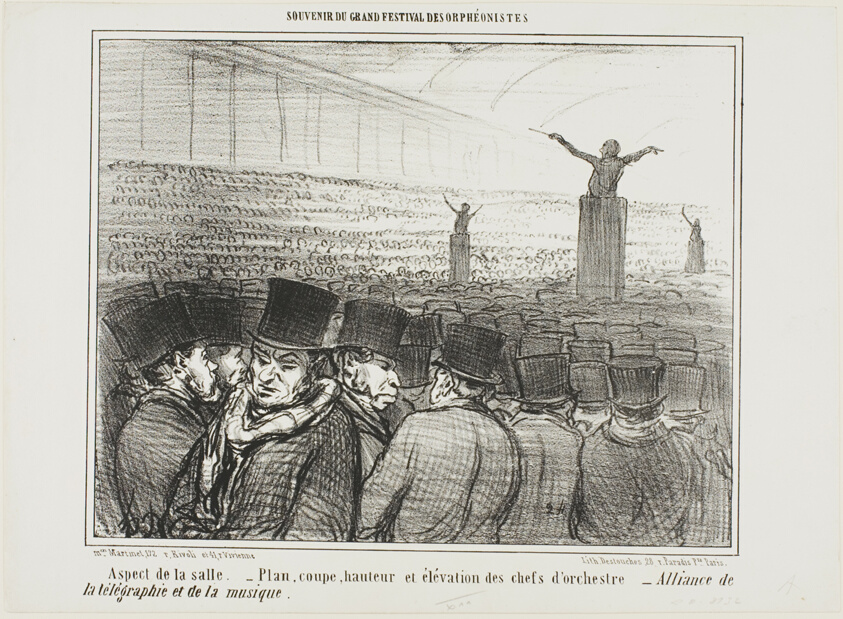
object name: Print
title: View of the grand hall. Map, height and view from front of the conductor. Grand alliance between telegraph and music, plate 1 from Souvenir Du Grand Festival Des Orphéonistes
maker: Honoré Victorin Daumier; French, 1808-1879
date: 1859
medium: Lithograph in black on white wove paper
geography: France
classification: lithograph; print; prints and drawing